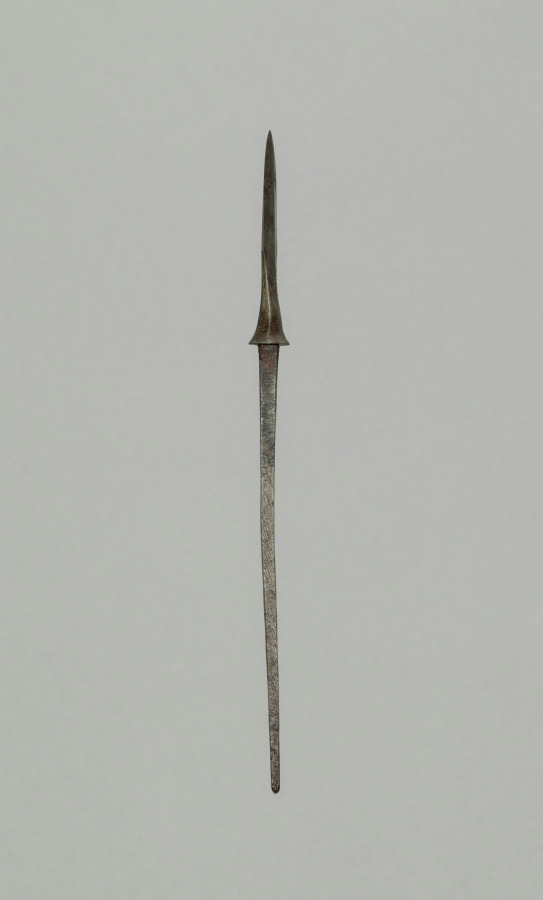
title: Arrow Point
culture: Japan, Edo period (1615–1868)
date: 1700s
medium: steel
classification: Arms and Armor